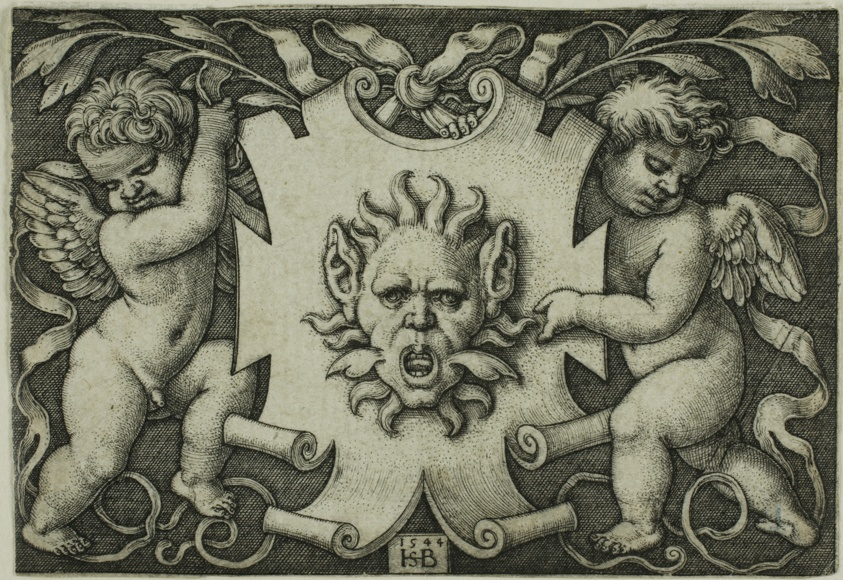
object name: Print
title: Ornament with a Mask Held by Two Genii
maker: Sebald Beham; German, 1500-1550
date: 1544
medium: Engraving in black on ivory laid paper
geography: Germany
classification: engraving; print; prints and drawing